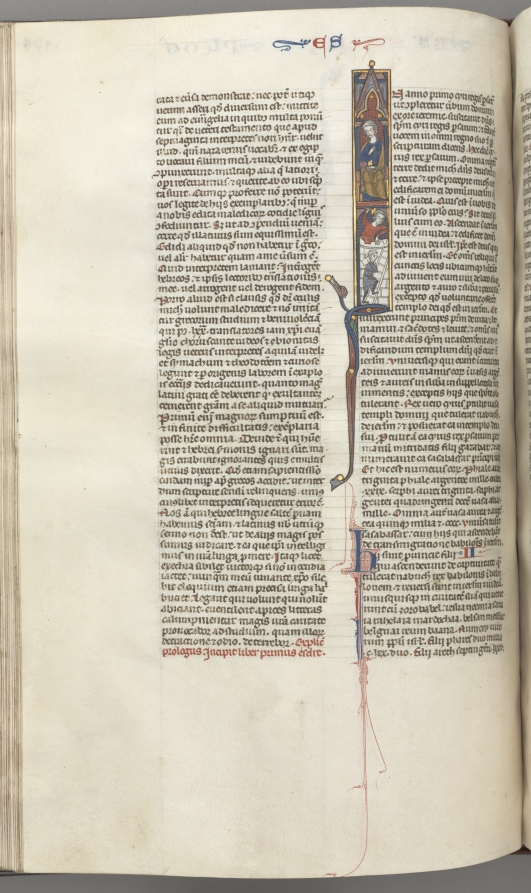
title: Fol. 174v, Ezra, historiated initial I, Cyrus directing the building of the Temple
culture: Southern France, Toulouse(?), 13th century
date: c. 1275–1300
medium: ink, tempera and gold on vellum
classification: Bound Volume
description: Biblical manuscripts were highly prized and important possessions of churches, monasteries, cathedral schools, and universities throughout medieval Europe. The biblical texts were known as the vulgate, the translations made by Saint Jerome in the fourth century from Hebrew and Greek into Latin, which became the definitive and official Latin version of the Roman Church. In the 13th century, the bible was, for the first time, produced as a single volume with an officially sanctioned sequence to its books and chapters as illustrated by this example. The very extensive decoration of this bible is arranged hierarchically to indicate the relative importance of the various texts so that full or almost full-page initials mark the openings of the first prologue, Genesis, and the first Gospel; historiated initials mark the beginning of each book and illuminated initials mark the Prologues.